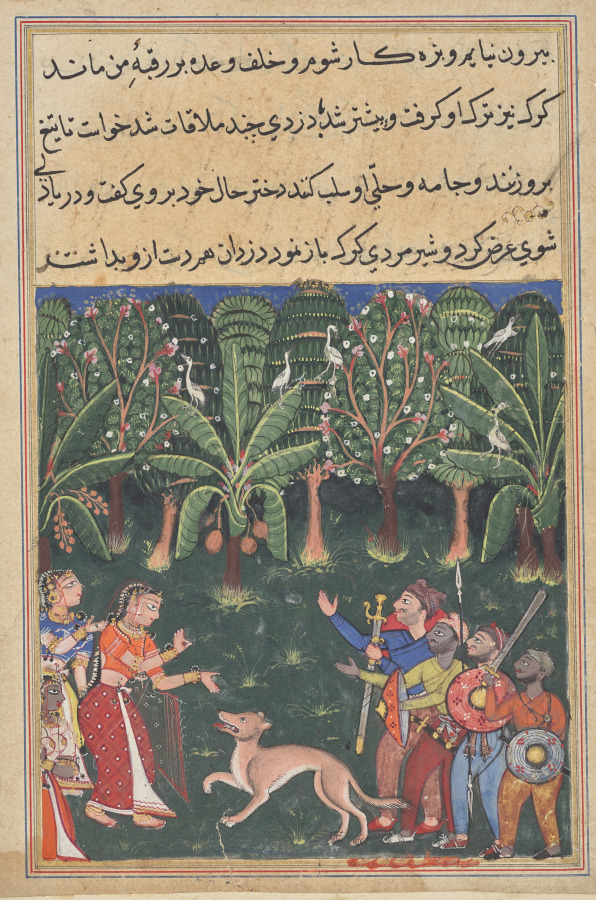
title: The merchant’s daughter encounters a wolf and bandits on her way to meet the gardener in order to keep her promise, from a Tuti-nama (Tales of a Parrot): Twelfth Night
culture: Mughal India, court of Akbar (reigned 1556–1605)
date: c. 1560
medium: gum tempera, ink, and gold on paper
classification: Painting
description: Persian books are read from right to left. One artist illustrated the three scenes from one of the 52 stories of the Tuti-nama, retaining many pre-Mughal traits. Trees stand out as bold shapes, and figures are arranged in a single register, or horizontal spatial band, and have angular and expressive gestures. The figures of the women are closely related to pre-Mughal types, shown always in profile and wearing garments that stand stiffly and sharply out before them. In leaves from the Tuti-nama, Mughal artists adapted the colors, compositions, and figure types of the earlier style.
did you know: The highly decorative way of painting trees did not continue into later Mughal painting traditions.